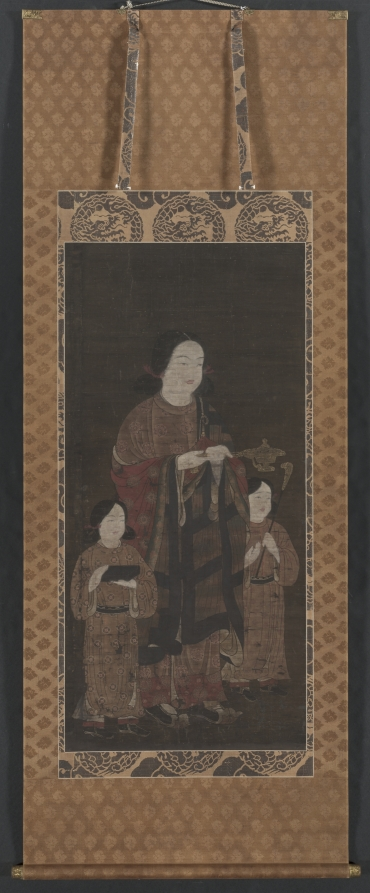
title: Shōtoku Taishi at Sixteen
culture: Japan, Muromachi period (1392–1573)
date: 1400s-1500s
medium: hanging scroll; ink and color on silk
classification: Painting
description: The 16-year-old prince regent Shōtoku Taishi, garbed in Buddhist vestments, bears an incense burner. He is flanked by two attendants; one carries religious texts in a box and the other holds a nyoi ceremonial Buddhist scepter. The two are sometimes identified as Shōtoku’s younger brother, Prince Eguri, and eldest son, Prince Yamashiro. Shōtoku has come to pray for his father, Emperor Yōmei (reigned 585–87), who is ill and on the point of death. Upon a miraculous recovery, the emperor accepted Buddhism.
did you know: One name for Shōtoku is "Prince Stable Door."